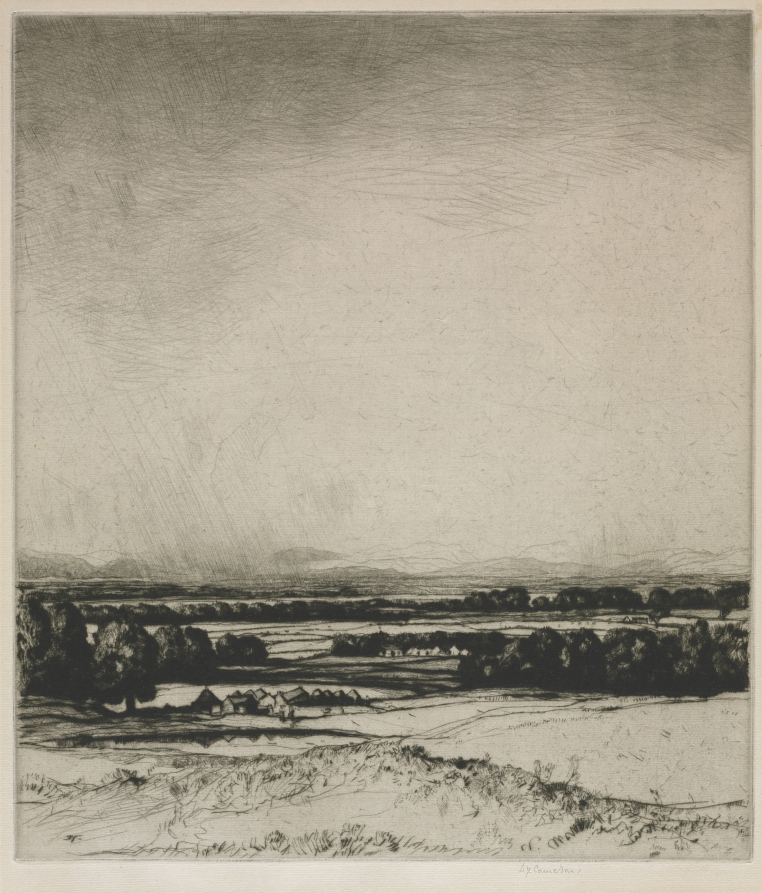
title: Valley of the Tay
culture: England, 20th century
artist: David Young Cameron (British, 1865–1945)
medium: drypoint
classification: Print